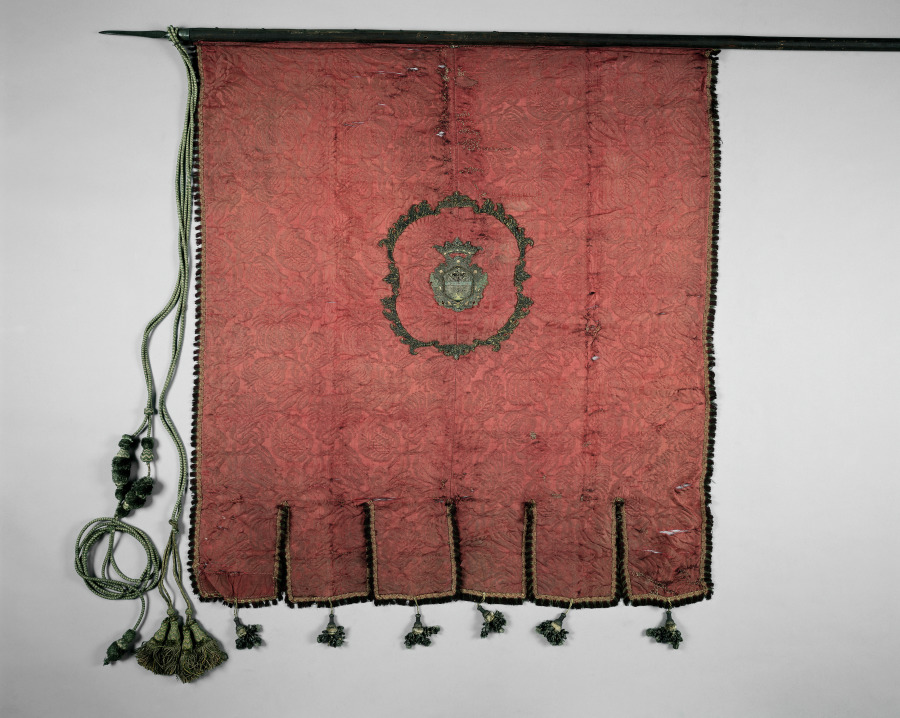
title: Banner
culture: Spain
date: 1700s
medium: crimson silk brocade, with applied embroidery; scalloped border with fringe and tassels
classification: Textile